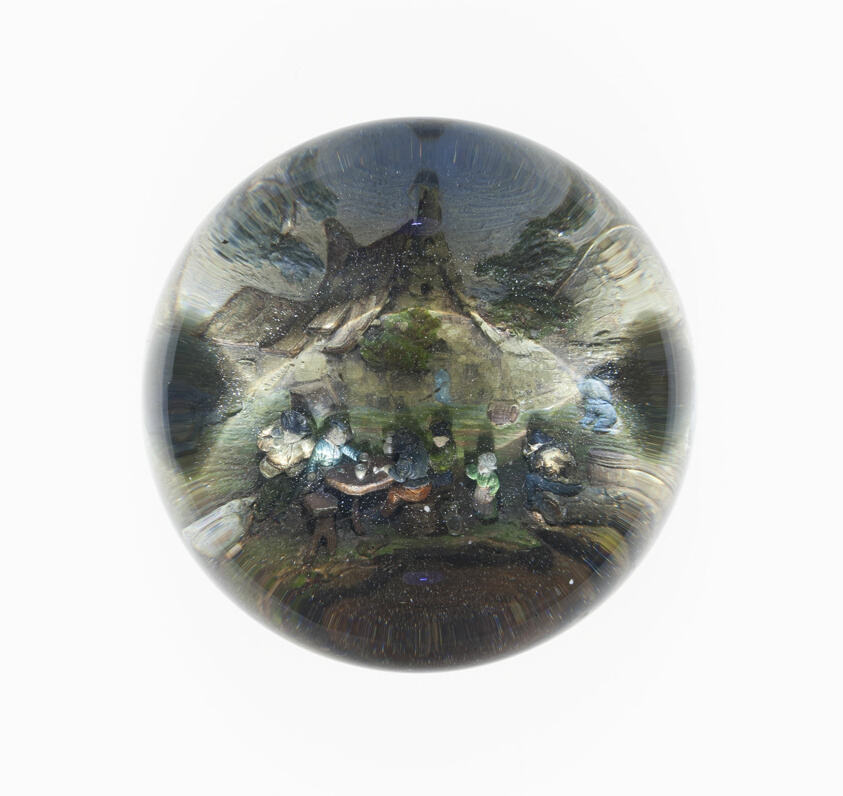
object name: Glass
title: Paperweight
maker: European, possibly English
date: c. 1848–60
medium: Glass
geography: England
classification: paperweight; glass; european decorative arts